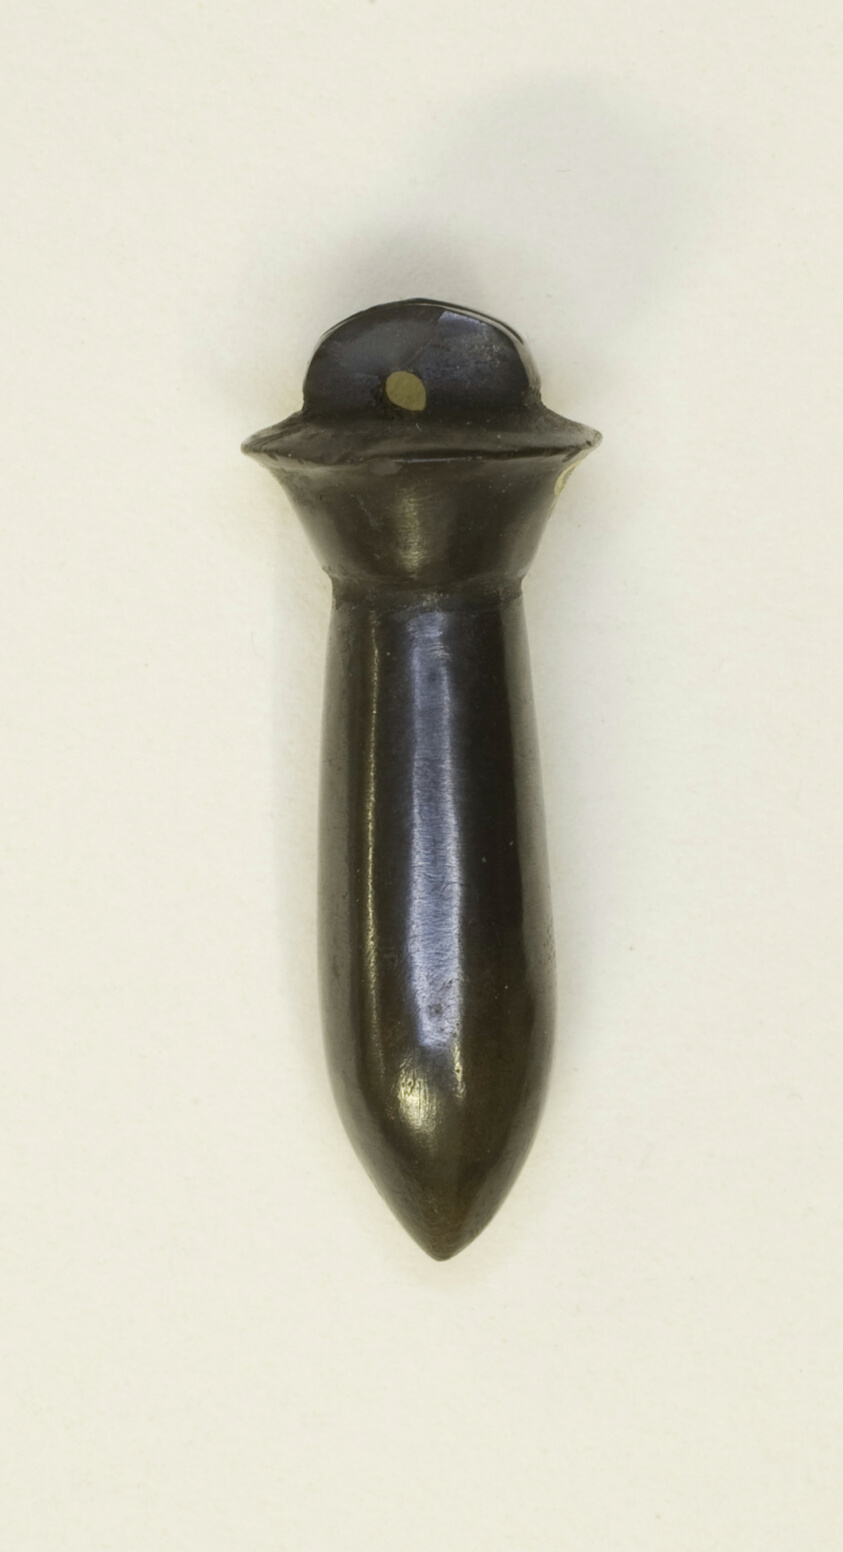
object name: Costume and Accessories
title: Amulet of a Papyrus Column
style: third intermediate period, egyptian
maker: Egyptian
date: Third Intermediate Period, Dynasty 21–25 (1070–656 BCE)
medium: Stone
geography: Egypt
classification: amulet; jewelry; stone; ancient art; costume